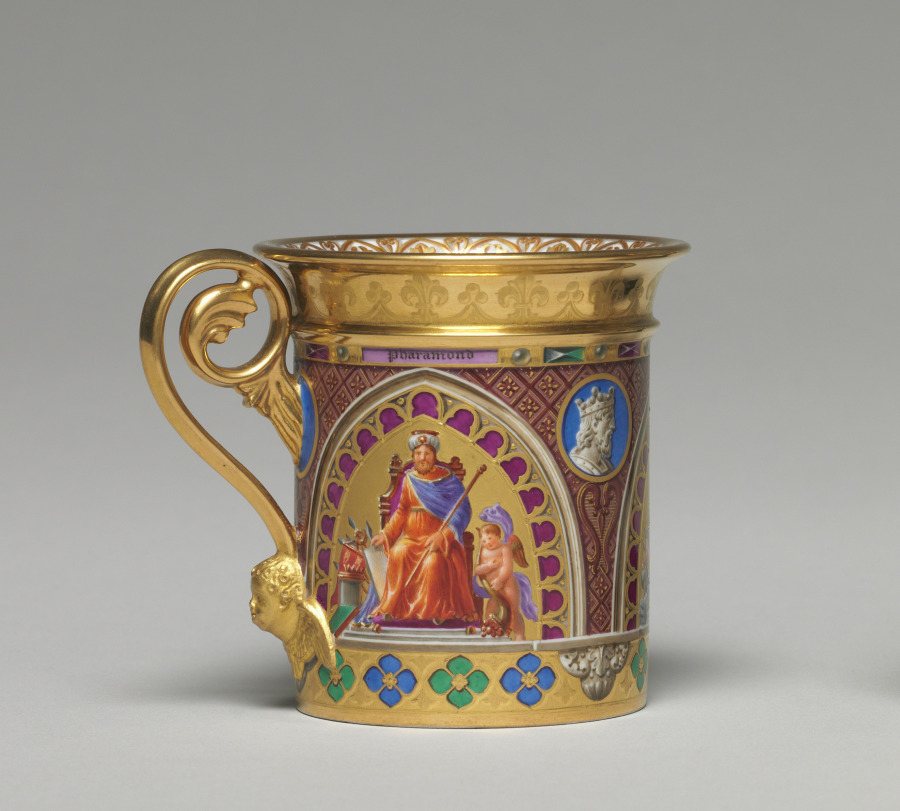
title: Cup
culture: France, Sèvres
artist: Sèvres Porcelain Factory (French, est. 1756)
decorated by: Pierre Huard (French)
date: 1827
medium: porcelain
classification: Ceramic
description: The 19th-century decorator of this cup embellished it with motifs from different eras, including portrayals of three ancient Frankish or French kings, surrounded by later Gothic style decoration.